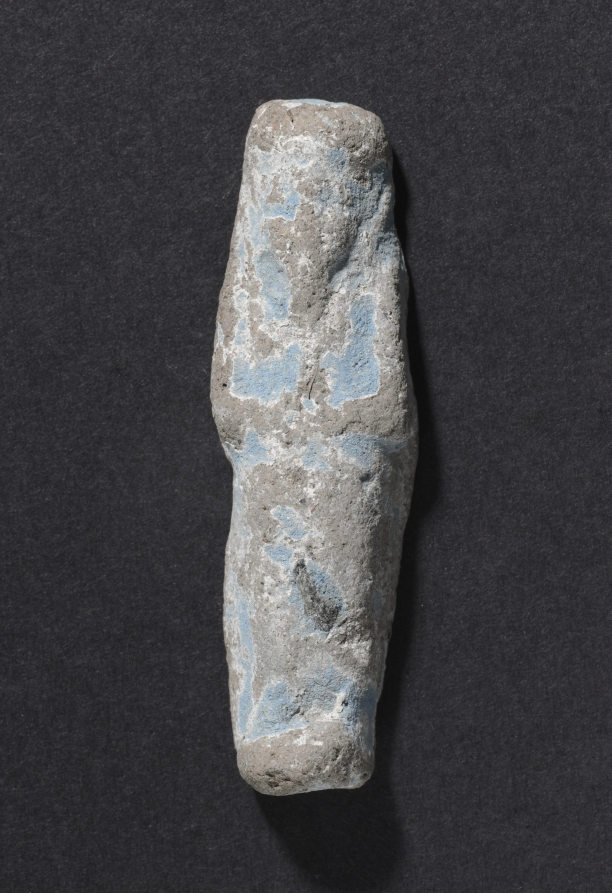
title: Shawabty of Ditamenpaankh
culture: Egypt, Late period (715–332 BCE), Dynasty 25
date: 715–656 BCE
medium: terracotta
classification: Funerary Equipment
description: High demand for shawabtys in the Late Period, a time when as many as 400 or more shawabtys were placed in the tomb with the deceased, gave rise to a specialized container for storing them: the shawabty box. This example is inscribed for the lady of the house, Ditamenpaankh, and was probably one of a pair originally made for her. The single-masted boat on the box's lid is perhaps an allusion to the pilgrimage of the deceased to the holy city of Abydos, the cult city of Osiris, king of the dead. The shawabtys inside are crude, mass-produced examples cast in an open mold. Made of terracotta, their blue paint imitates more costly shawabtys made of faience. As for the shawabty spell, it has been removed from its traditional location on the shawabty's front and relocated onto the sides of box, where it needed only to be written once, thus expediting production.